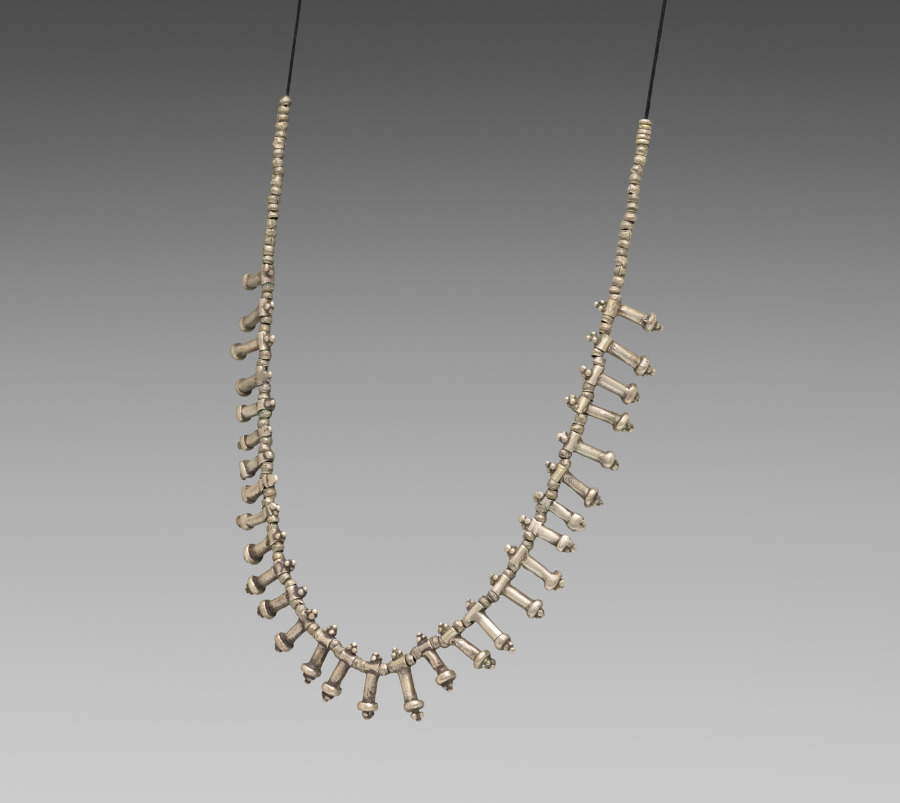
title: Necklace with beads (sadi?)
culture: Africa, East Africa, Ethiopia, unknown silversmith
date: late 1800s or early 1900s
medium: silver alloy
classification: Jewelry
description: This necklace has an abundance of phallic beads representing fertility framed by dozens of smaller silver beads. Specialists in gold and silver would melt silver into small balls that were then attached to drawn rods of metal. Atop each bead is a pile of small granulations; these tiny metal spheres are small like pieces of grain.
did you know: There are no local sources of silver in Ethiopia.